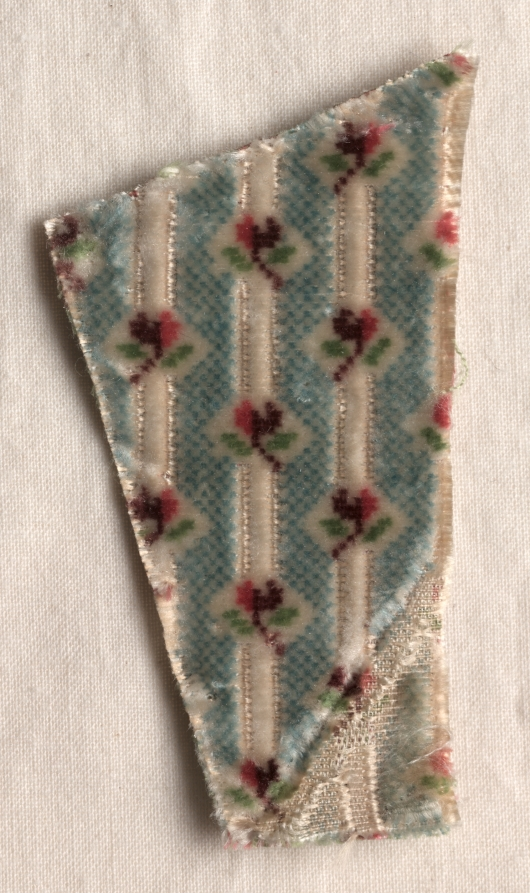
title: Textile Fragment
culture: France, late 18th century, Period of Louis XVI (1774-1793)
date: 1774–1793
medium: velvet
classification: Velvet